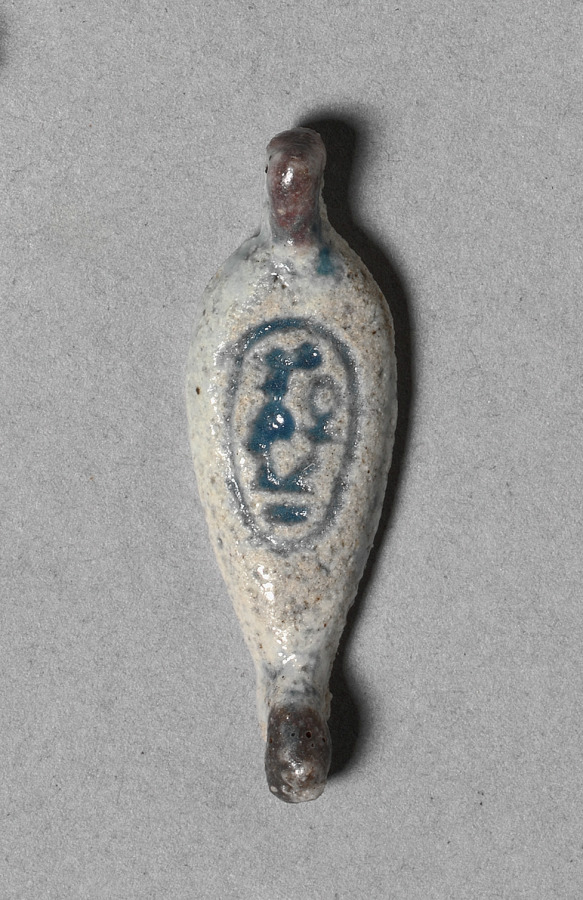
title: Petal-Shaped Bead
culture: Egypt, New Kingdom (1540–1069 BCE), Dynasty 18, reign of Amenhotep III (1390–1352 BCE)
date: c. 1391–1353 BCE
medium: faience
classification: Jewelry